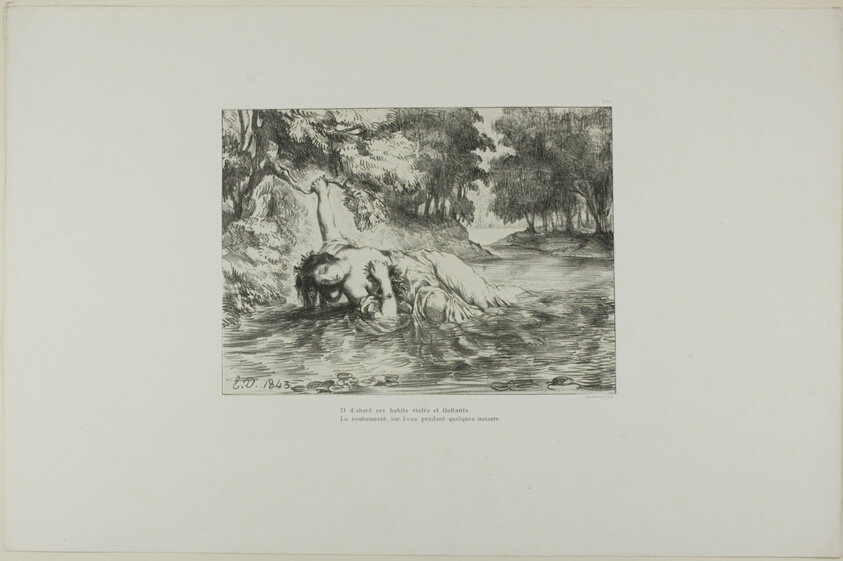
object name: Print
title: Ophelia's Death, plate 13 from Hamlet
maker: Eugène Delacroix (French, 1798-1863)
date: 1843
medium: Lithograph in black on ivory China paper laid down on white wove paper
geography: France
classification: lithograph; print; prints and drawing